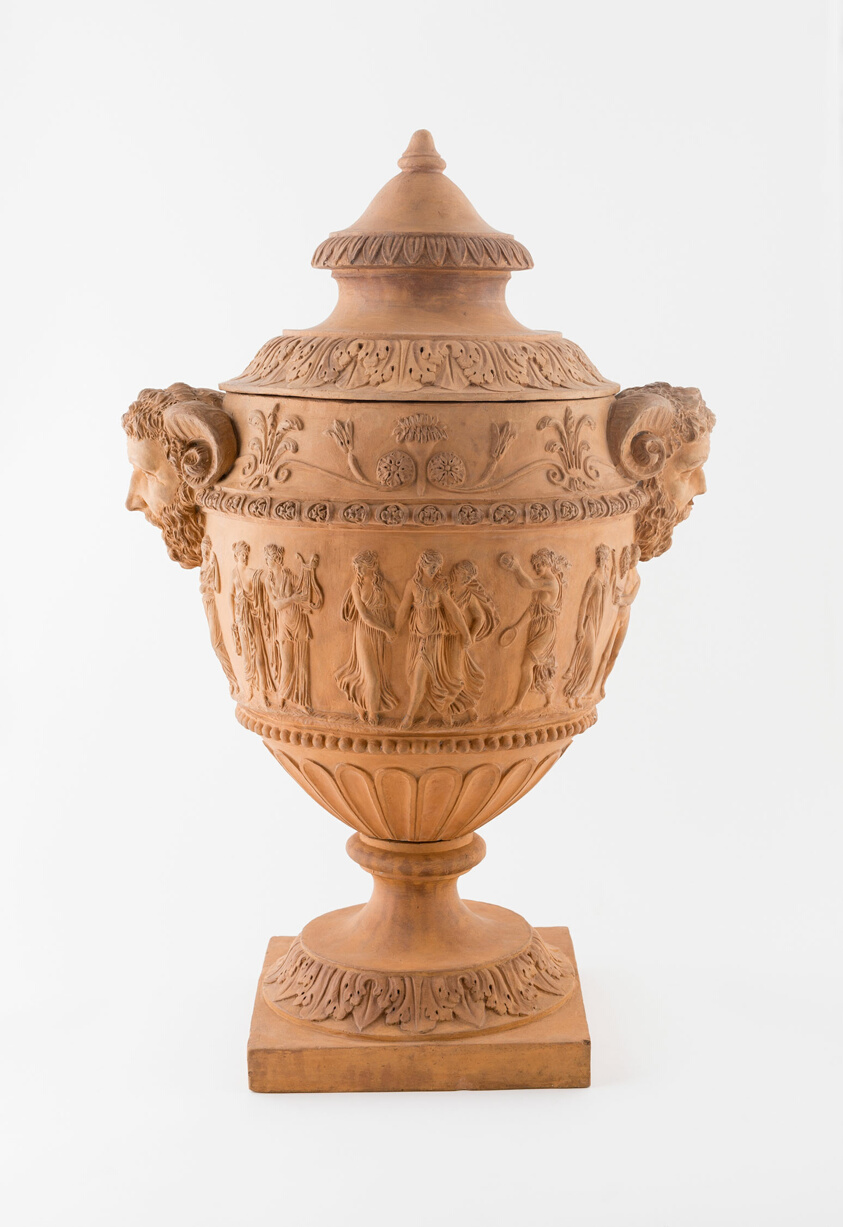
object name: Ceramics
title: Urn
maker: England or France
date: 1775/1800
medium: Terracotta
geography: England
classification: functional object; sculpture; ceramics